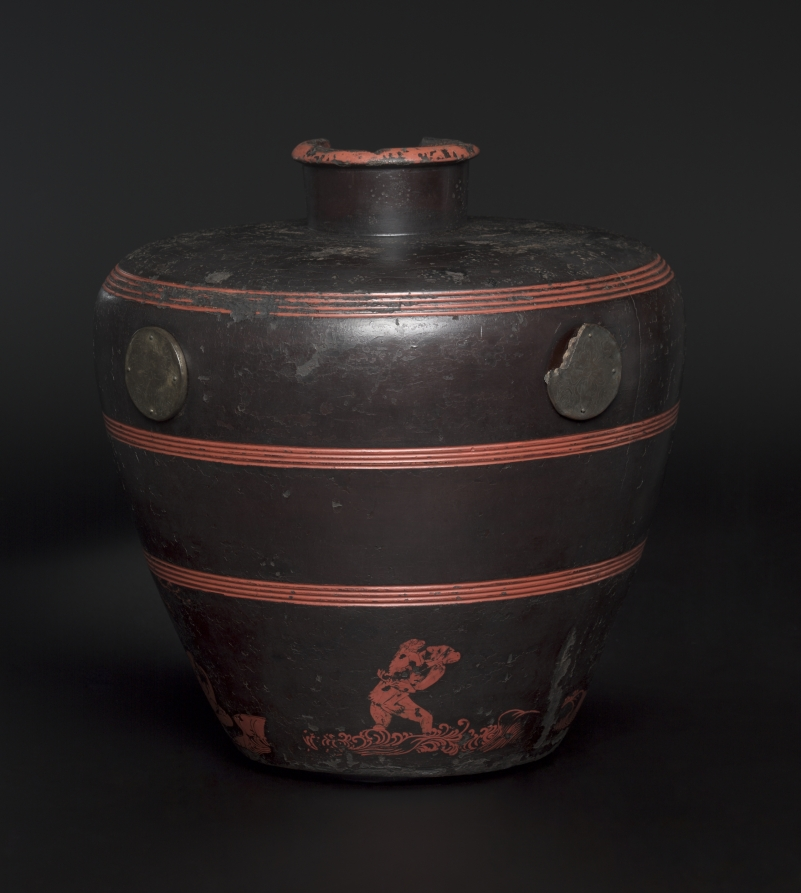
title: Jar with Scenes of Frolicking Xingxing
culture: Japan, Kamakura period (1185–1333)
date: 1302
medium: Zelkova wood, covered with hemp cloth and colored lacquer, and bronze-plated wood fittings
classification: Lacquer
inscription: Dated 1302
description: This jar features a design of a monkey-like animal ladling sake into his mouth from a vessel bobbing in waves, along with others trying on sandals and crossing a river. In the 1300s, Chinese literature was a powerful source of inspiration for artistic practice in Japan, and this scene was inspired by the exploits of the mythical xingxing, a beast of ancient Chinese lore for whom people left straw sandals and wine. The xingxing would then recite the names of the ancestors of those who had left them the gifts.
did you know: To make this vessel, a wooden form was covered with successive layers of lacquer, the clear sap of the highly toxic Rhus verniciflua tree.